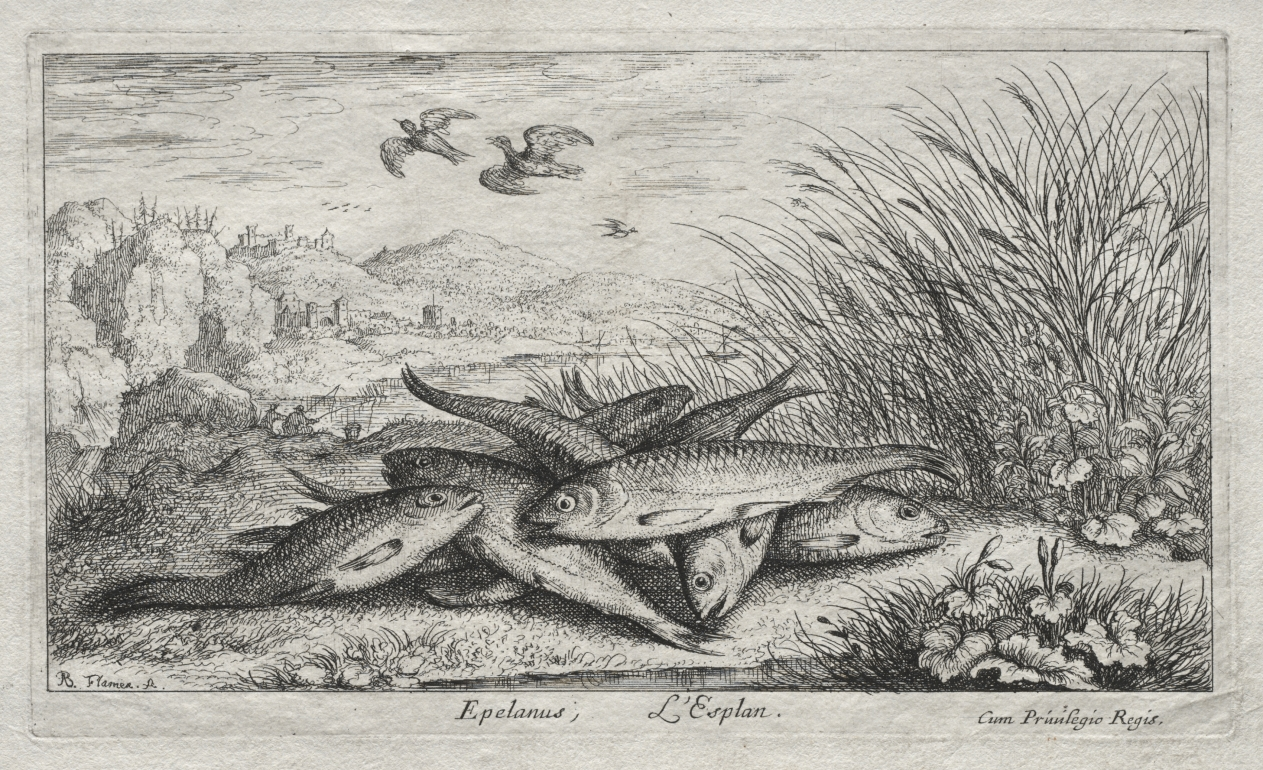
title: Seconde Partie de Poissons d'eau douce (Several Fresh Water Fish Species. Part II): Epelanus, L' Esplan (The Smelt)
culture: Flanders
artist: Albert Flamen (Flemish, c. 1620–1669)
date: 1635–69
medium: etching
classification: Print